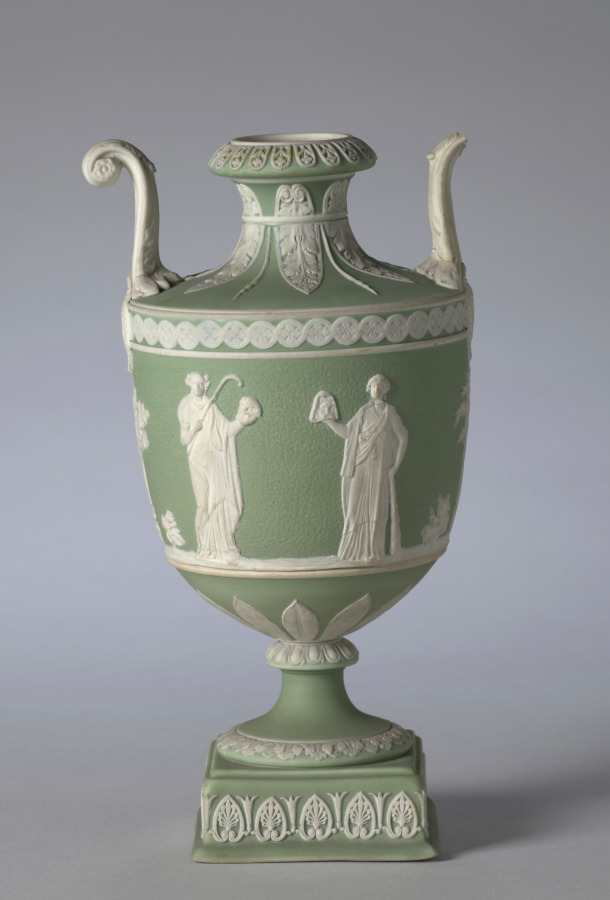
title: Urn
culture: England, Staffordshire, late 18th-early 19th Century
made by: Wedgwood Factory (British)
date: c. 1800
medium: jasper ware with relief decoration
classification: Ceramic